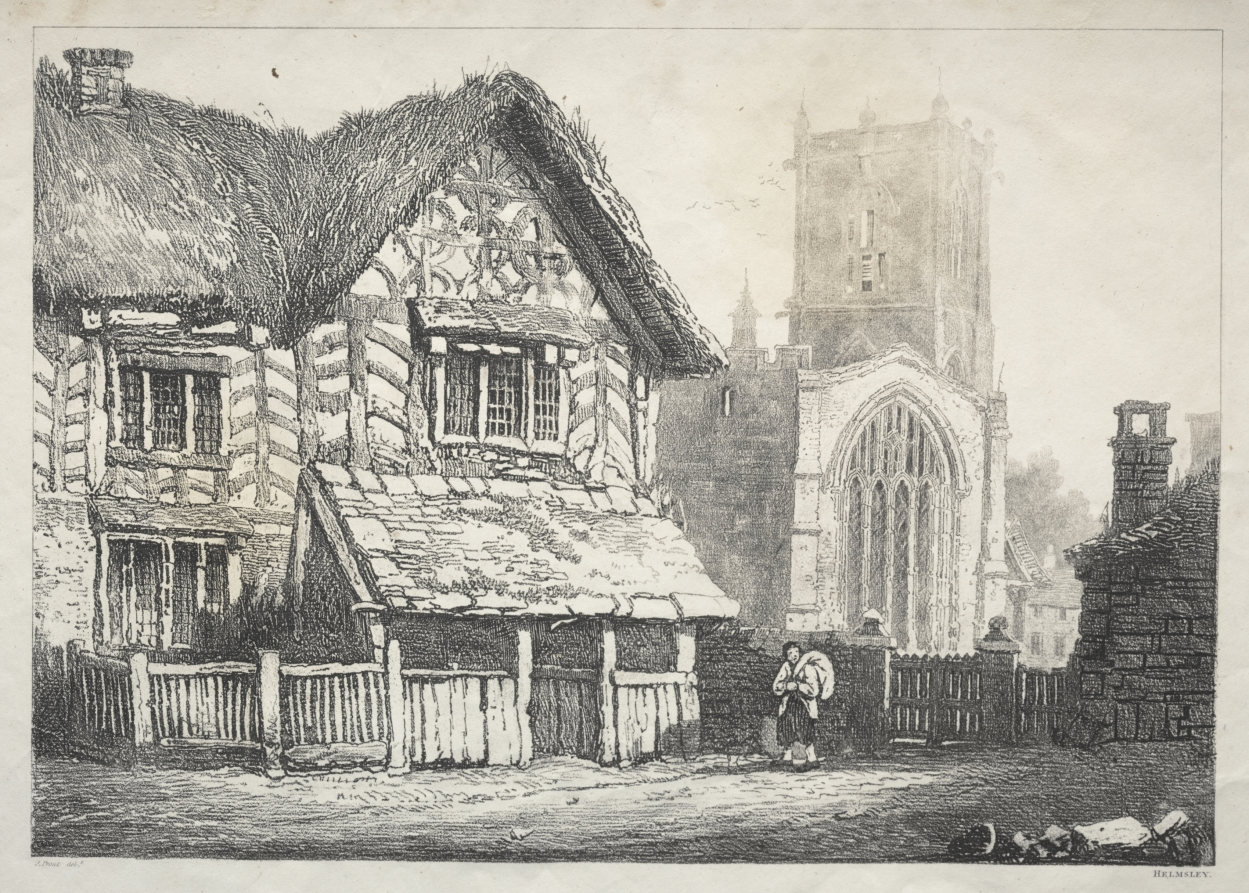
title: A Series of Ancient Buildings and Rural Cottages in the North of England: Helmsley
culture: England, 19th century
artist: Samuel Prout (British, 1783–1852)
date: 1821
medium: softground etching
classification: Print